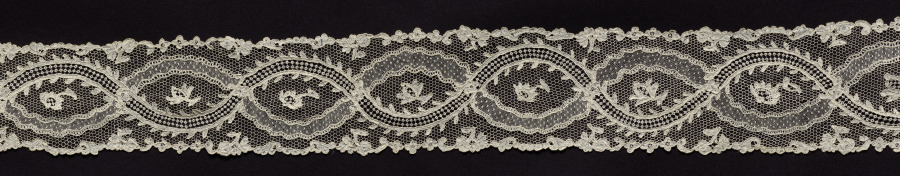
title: Lace Lappet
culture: France, Argentan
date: 1715–74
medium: Linen: needle lace (Point de Argentan)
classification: Lace